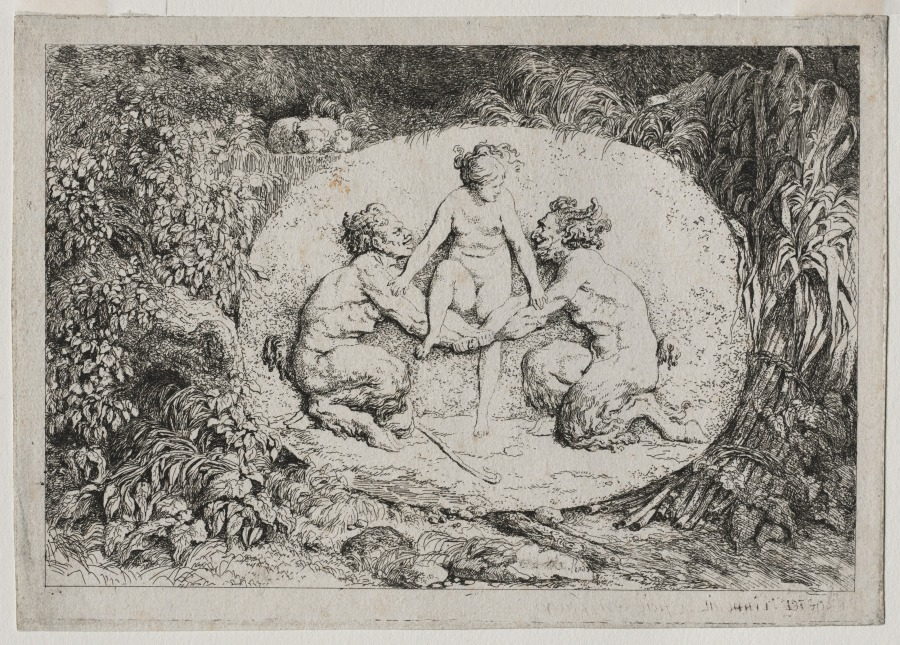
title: Bacchanales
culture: France, 18th century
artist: Jean-Honoré Fragonard (French, 1732–1806)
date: 1763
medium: Set of 4 etchings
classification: Print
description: Jean-Honoré Fragonard made these four etchings shortly after returning to Paris from Italy, where he studied antique subjects and sculpture. He may have also looked at other sources for inspiration, such as Jacques François Joseph Saly’s suite of vase designs. Though the prints feature the followers of Bacchus, the wine god does not make an appearance. Instead, Fragonard highlighted the playfully erotic frolics, conflicts, and even family life of a group of bacchants, conceiving them as low-relief sculptures on stone fragments within abundant foliage. Fragonard’s creations helped to popularize revelries in nature in French art, architecture, and garden design during the later 1700s.